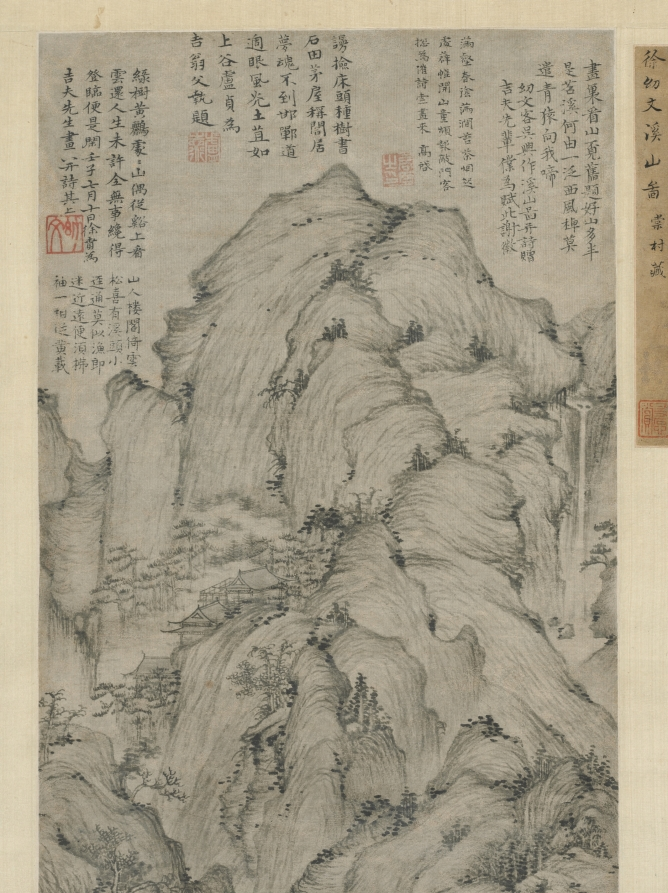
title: Streams and Mountains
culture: China, Yuan dynasty (1271-1368)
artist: Xu Ben (Chinese, 1335–1380)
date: 1372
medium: hanging scroll, ink on paper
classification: Painting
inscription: 綠樹黃鸝處處山， 偶從谿上看雲還。/ 人生未許全無事， 纔得登臨便是閑。 壬子七月十日徐賁為吉夫先生畫 並詩共上 [印] 幼文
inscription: Label on mounting probably by Liang Qingbiao 梁清標 (1620–1691).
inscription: 4 additional inscriptions and 9 additional seals: 1 poem of Xie Hui 謝徽 (c. 2nd half 14th c.); 1 poem and 1 seal of Gao Qi 高啟 (1336–1374); 1 poem and 1 seal of Lu Zhen 盧貞 (c. late 14th c.); 1 poem of Huang Zai 黃載; 3 seals of Liang Qingbiao 梁清標 (1620–1691); 1 seal of Wang Jiqian [C. C. Wang] 王季遷 (1907–2003); 3 seals unidentified.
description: Like many literati of the late Yuan and early Ming dynasties, Xu Ben was entangled with the perils of dynastic change as well as the ups and downs of his official career. It was mainly through the art of painting and poetry, as well as the ideal of reclusion, that he sought feelings of exhilaration and shared them with his friends. Xu created this monumental landscape during one of his periods of reclusion. His innumerable “hemp-fiber” texture strokes create a unifying rhythm among the towering mountains with tightly knit masses of rocks. Nestled among shady trees at the base of the mountain is a rustic retreat, which a scholar approaches on foot to visit with the hermit. Among the five inscriptions at the top of the painting is one by the artist himself. He dedicated the painting to someone named Jifu 吉夫 and recorded a poem in praise of mountains. Green trees, yellow orioles, everywhere are mountains; Aimlessly I return from the stream, where I watched the clouds. Man's life does not allow unbroken ease, But to be able to be high up in the mountain, this is leisure.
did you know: An attendant opens a reed gate to welcome the scholar with a walking stick approaching the rustic retreat.